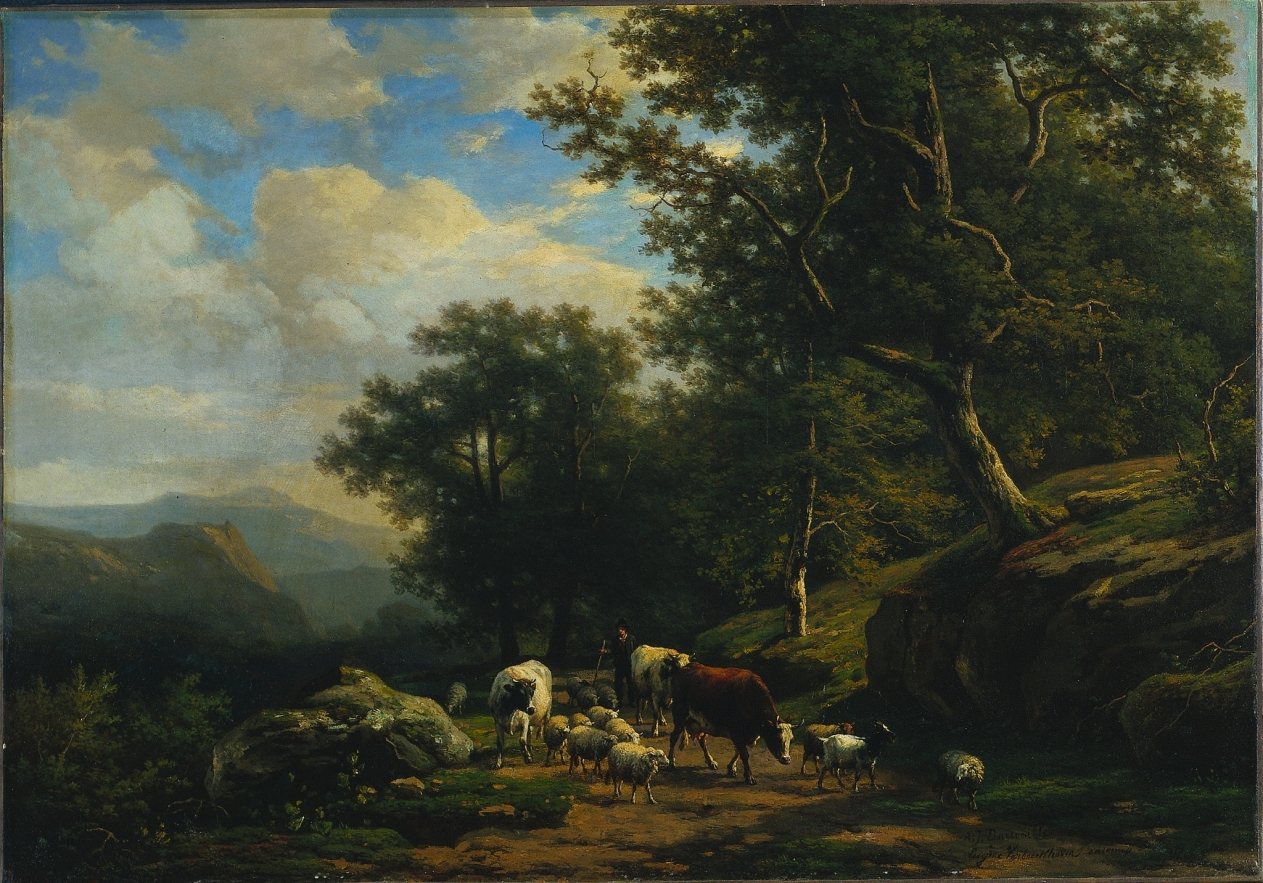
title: Landscape with a Peasant and His Flock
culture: Netherlands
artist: Alexander Joseph Daiwaille (Dutch, 1818–1888)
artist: and Eugène Joseph Verboeckhoven (Belgian, 1798–1881)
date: c. 1850–59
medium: oil on fabric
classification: Painting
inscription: Signed lower right: A. J. Daiwaille [in reddish-brown paint] / Eugène Verboeckhoven animaux [in black paint]